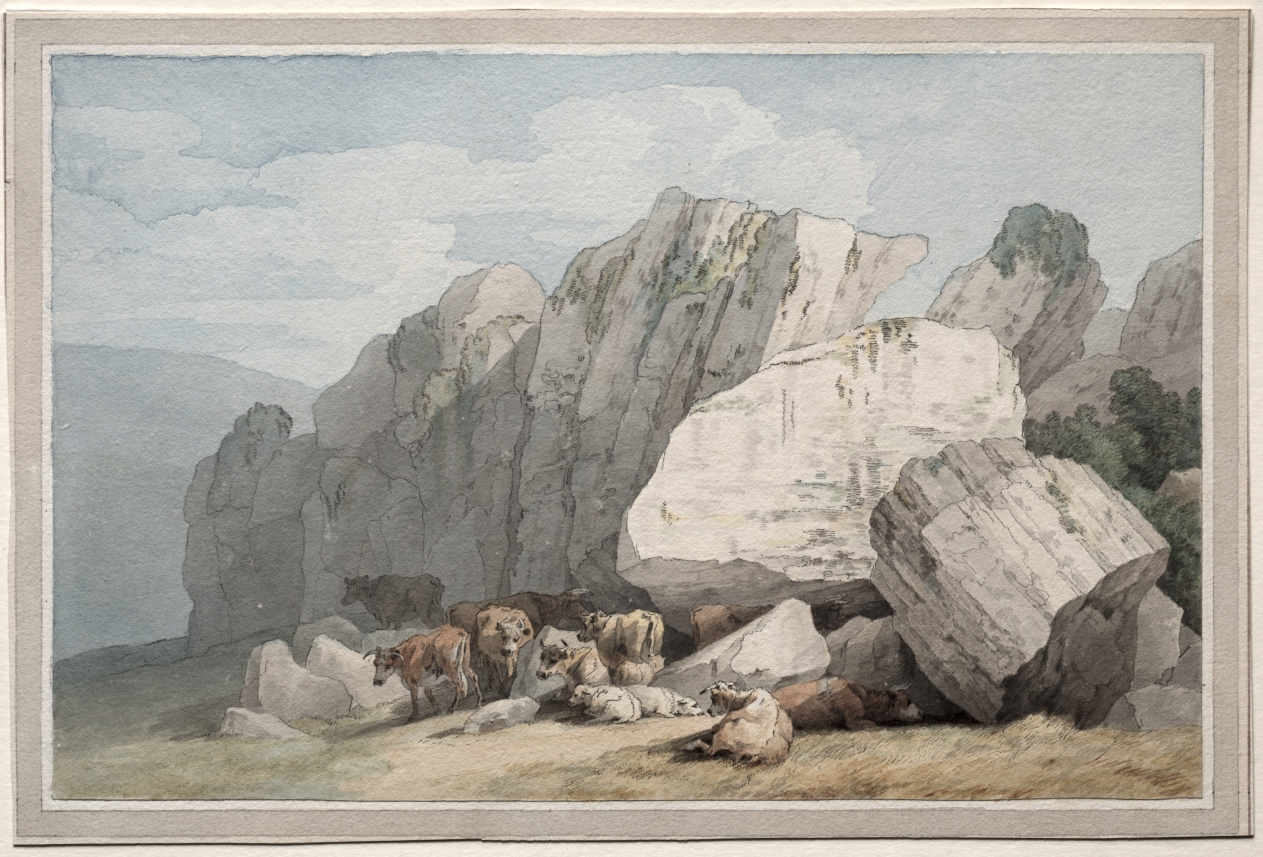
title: Leigh Tor Rocks at Poundsgate, near New Bridge on the Dart, Devon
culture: England, 19th century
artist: John White Abbott (British, 1763–1851)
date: 1800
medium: watercolor with pen and black ink and traces of graphite underdrawing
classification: Drawing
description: This closely observed watercolor was made in Dartmoor—an expanse of moorland in southwest England capped with a series of more than 100 exposed granite hilltops known as "tors," ranging from the monolithic to the nondescript. John White Abbott chose a low vantage point that accentuated the looming immensity of the outcrop in whose shelter a herd of cows has converged. Almost austere in its lack of superfluous detail, this small sheet suggests the untamed quality of the Devon moors.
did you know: In addition to working as a watercolorist, John White Abbott served professionally as an apothecary and surgeon.